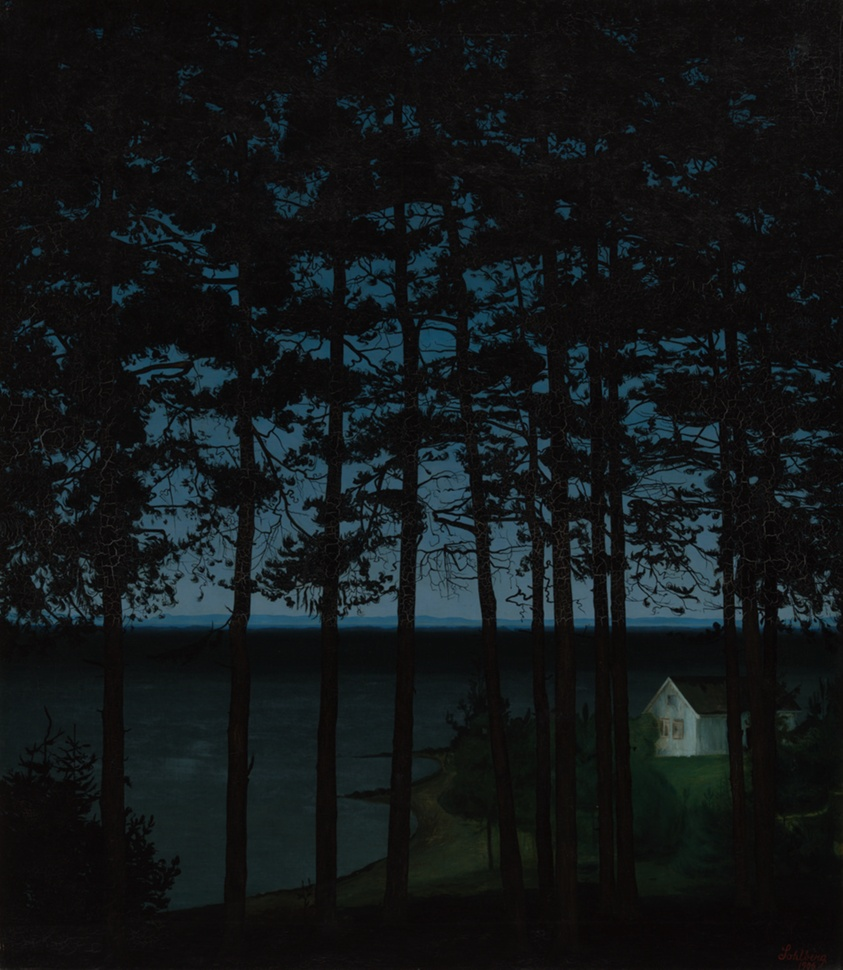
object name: Painting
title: Fisherman's Cottage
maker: Harald Sohlberg; Norwegian, 1869-1935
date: 1906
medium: Oil on canvas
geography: Norway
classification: oil on canvas; painting; modern and contemporary art